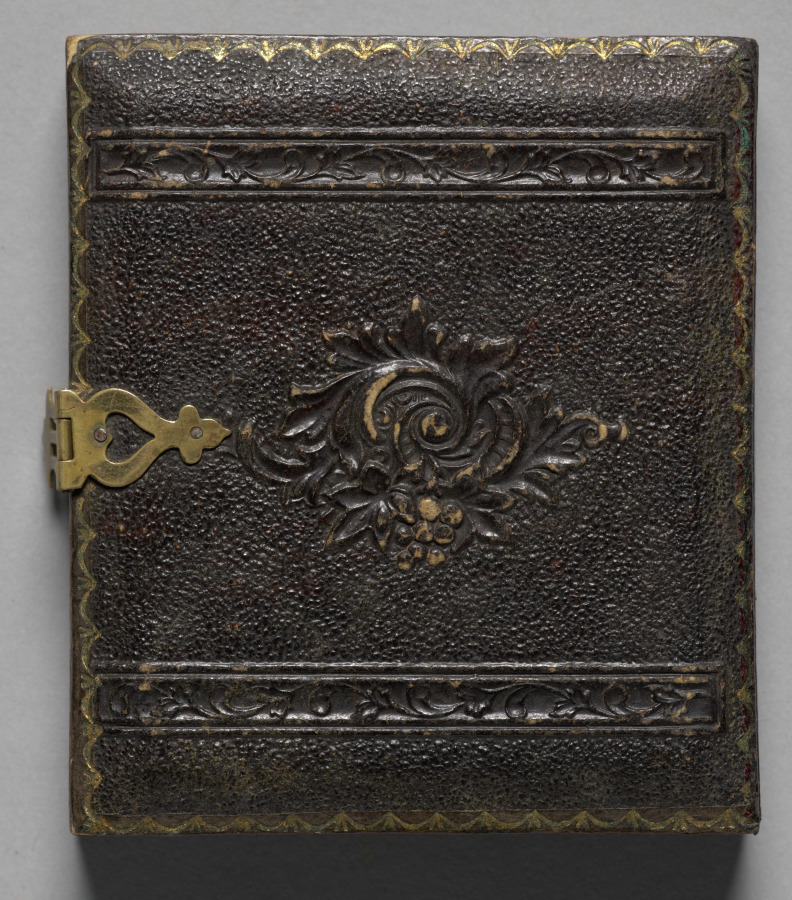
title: Poodle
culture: America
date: c. 1861–63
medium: ambrotype, tinted, sixth plate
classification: Photograph